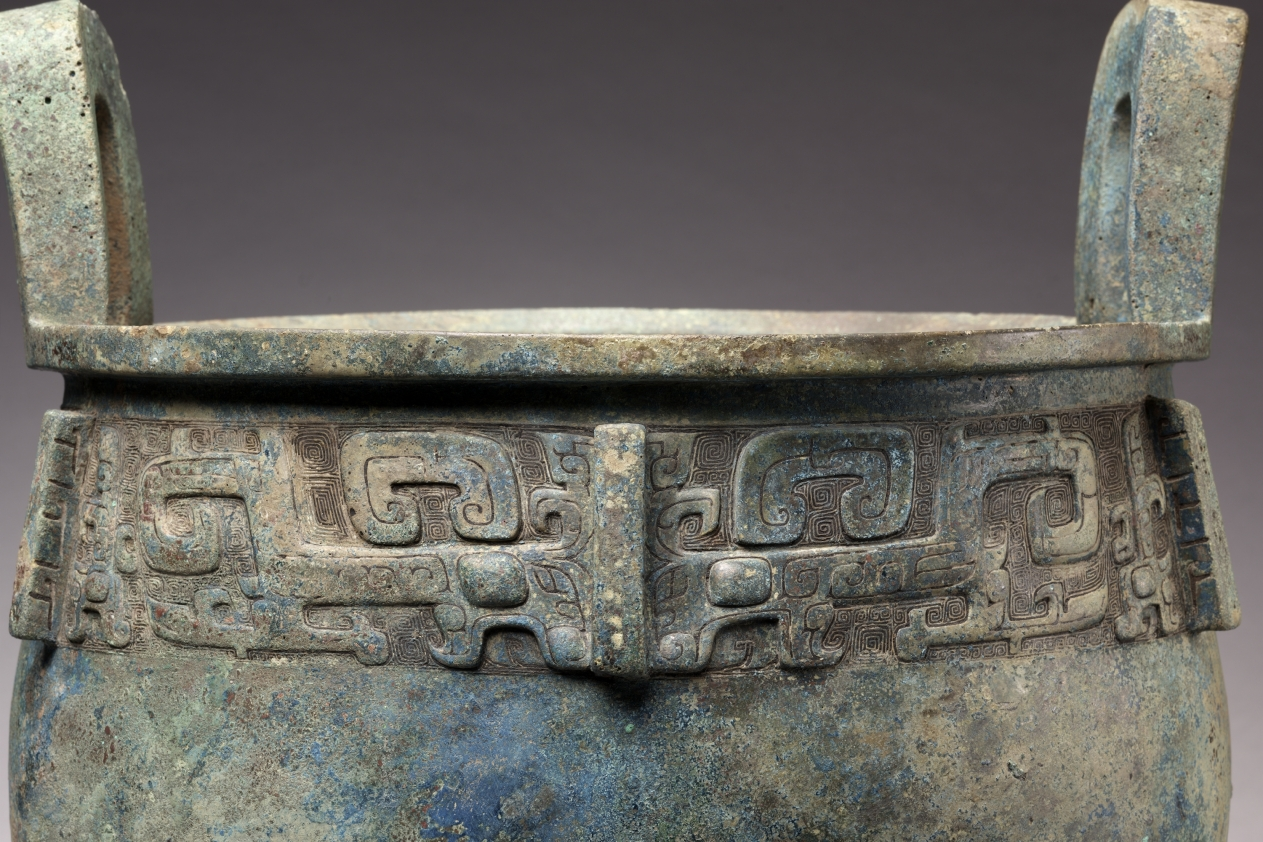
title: Tripod (Ding)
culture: China, Western Zhou dynasty (c. 1046–771 BCE)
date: 1000s BCE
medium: bronze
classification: Metalwork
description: Large and majestic, this tripod gives the effect of overpowering force. Three animal masks (known as taotie) with coiled creatures are aligned in the decorative frieze. With the gaze of the staring eyes, the animal masks assert a religious presence and are meant to instill fear. Bold images of the ram embellish the three legs of the vessel. Bronze cauldrons (ding) like this were made for offerings of food to ancestral spirits in sacrificial and funerary rites performed by the rulers or members of the aristocracy. The ding, in particular, assumed additional significance as the symbol of political power and legitimacy. As signs of status in a stratified society, such highly valued bronzes were cast by its makers with the wish to be "forever treasured for ten thousand years, by sons' sons and grandsons' grandsons."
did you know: Bronze tripods of the ding-type were vessels made in sets of different sizes to be used in rituals, in which grain and meat was offered to the spirits of the ancestors.